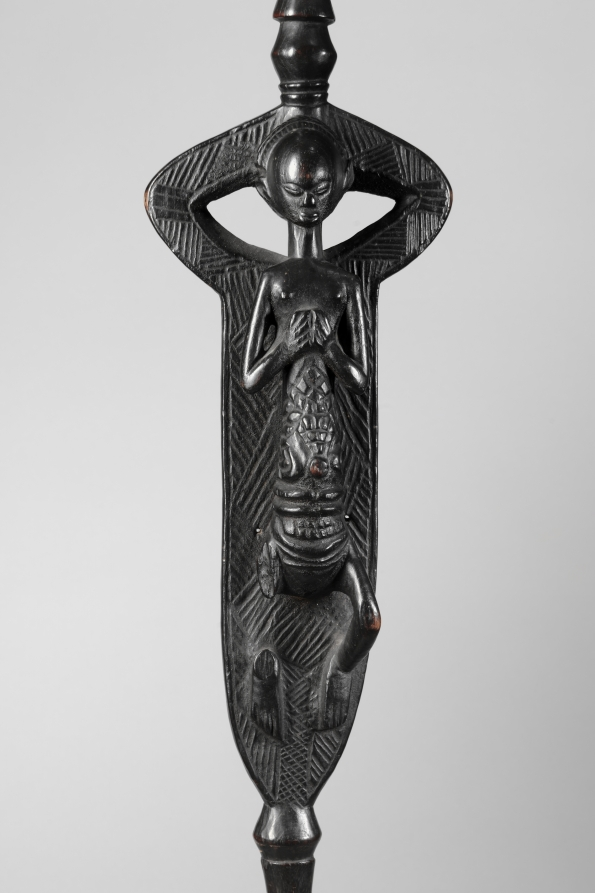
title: Staff of Office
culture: Central Africa, Democratic Republic of the Congo, Luba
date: early to mid-1800s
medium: Wood and iron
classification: Sculpture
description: Sanctified by a ritual specialist and enhanced with medicinal substances, the staff possessed supernatural qualities and was endowed with healing power. Luba staffs are among the most important regalia of Luba kings. The metal point alludes to the kingdom's stability and durability. Each staff has its own distinctive iconography to reflect regional styles. As Chief Msidi (former owner of this staff) ruled over the Yeke kingdom (and not the Luba kingdom), it begs the question of how he acquired this symbol of another realm's power.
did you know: The Yeke kingdom ruler Chief Msidi gave this as a gift of appreciation to the British missionary Frederick Stanley Arnot, whom the chief had invited to his kingdom.